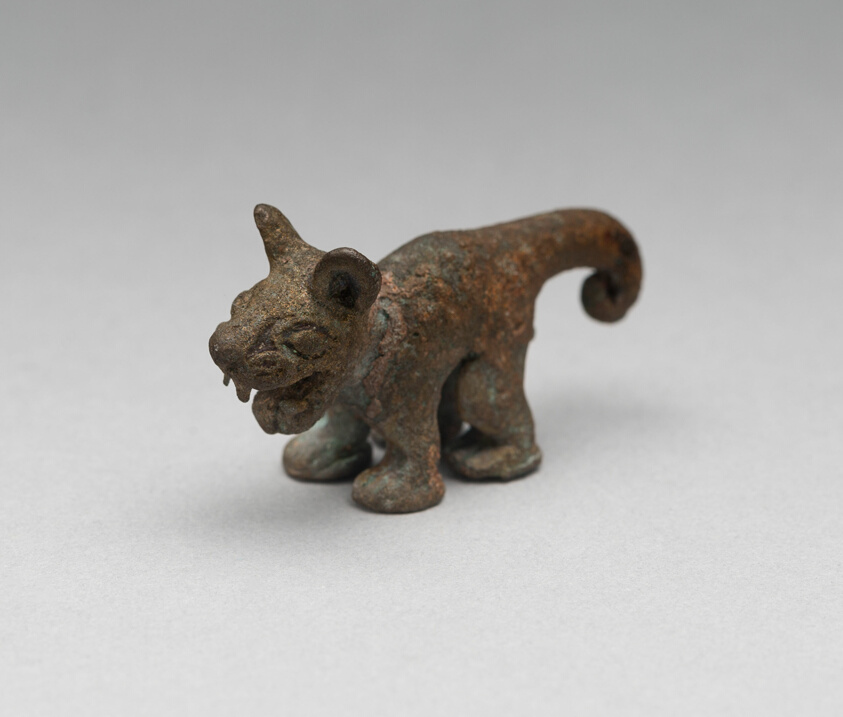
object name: Sculpture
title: Figure of a Feline, Possibly a Finial for a Pin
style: chimú, late intermediate period, Pre-Columbian, americas, Arts of the Americas, andean, andes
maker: Chimú (North coast, Peru)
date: 1100–1470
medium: Bronze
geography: Peruvian North Coast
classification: metal; sculpture; art of the americas